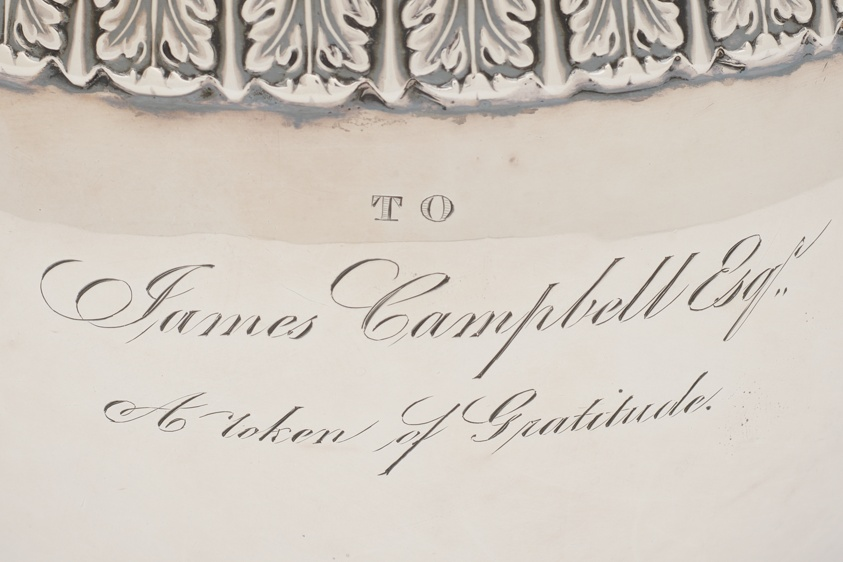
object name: Metalwork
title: Pitcher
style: 19th century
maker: Retailed by Baldwin Gardiner (American, 1791–1869); New York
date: 1827–48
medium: Silver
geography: New York City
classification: pitcher (vessel); silver; decorative arts